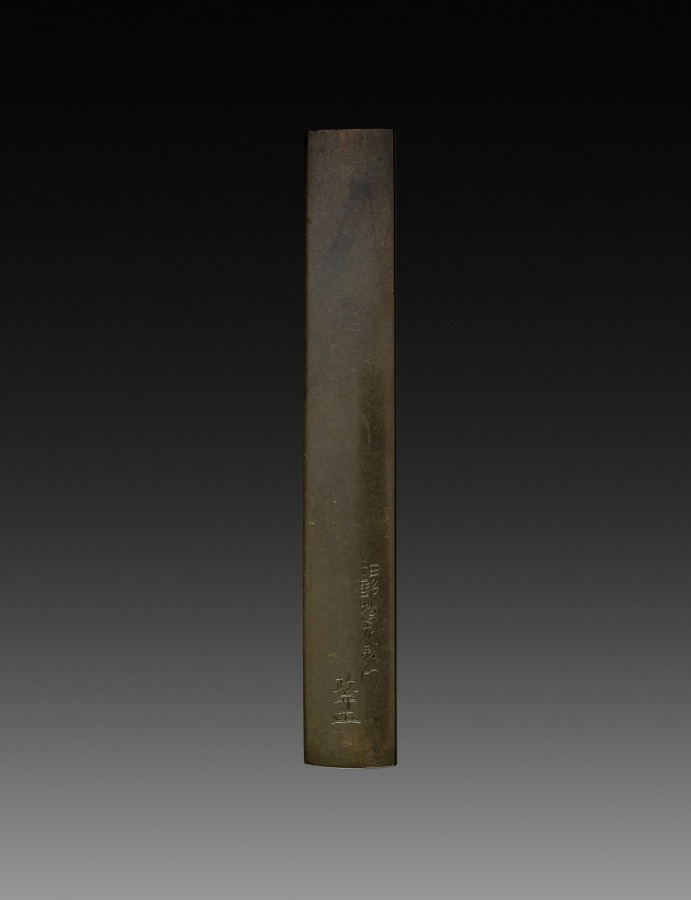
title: Knife Handle (Kozuka)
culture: Japan, Edo period (1615–1868)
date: early to mid-1800s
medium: inlaid bronze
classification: Metalwork